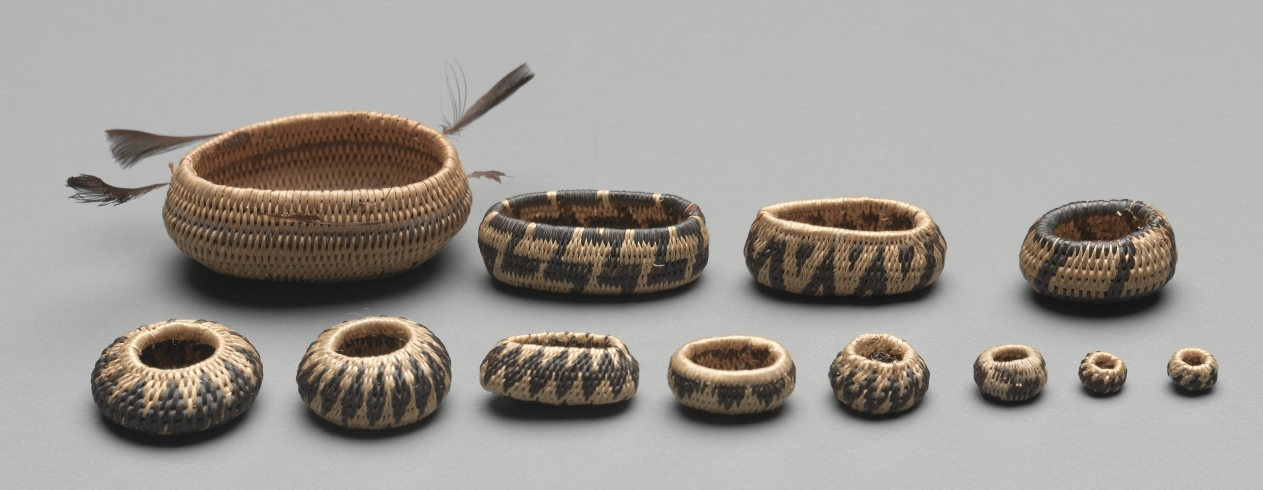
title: Miniature Round Basket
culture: California, Pomo, late 19th-early 20th century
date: late 1800s-early 1900s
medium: plant materials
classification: Basketry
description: Miniature baskets were made to demonstrate the basket-maker’s virtuoso skill, and these tiny marvels seem to be no exception—the smallest are only five millimeters wide but still patterned. For such fine work, dexterity was required as much for preparation of materials as for weaving.